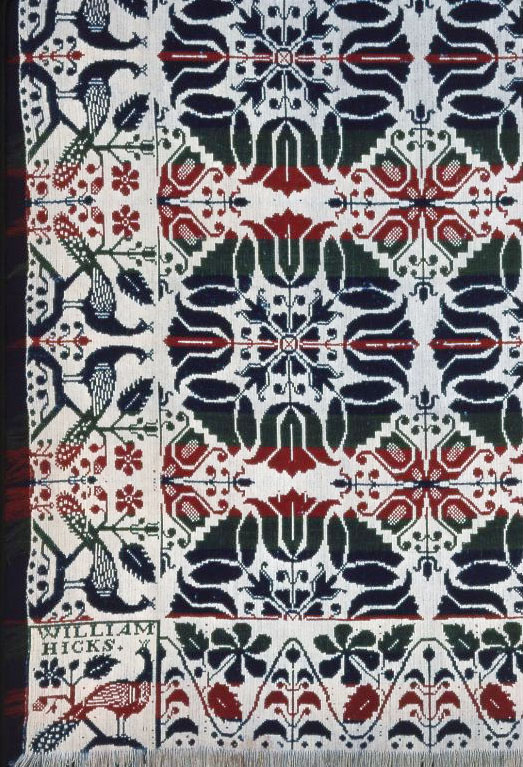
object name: Textile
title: Coverlet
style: 19th century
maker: William Hicks (American, 1821–1903); United States, Indiana, Madison County, Killbuck Creek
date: 1850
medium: Cotton and wool, plain weave with plain interlacings of secondary binding warps and patterning wefts (Beiderwand); woven on loom with Jacquard attachment; two loom widths joined; fringed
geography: Indiana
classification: weaving - coverlet; weaving; coverlet; textile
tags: flowers, peacocks, foliage, coverlet